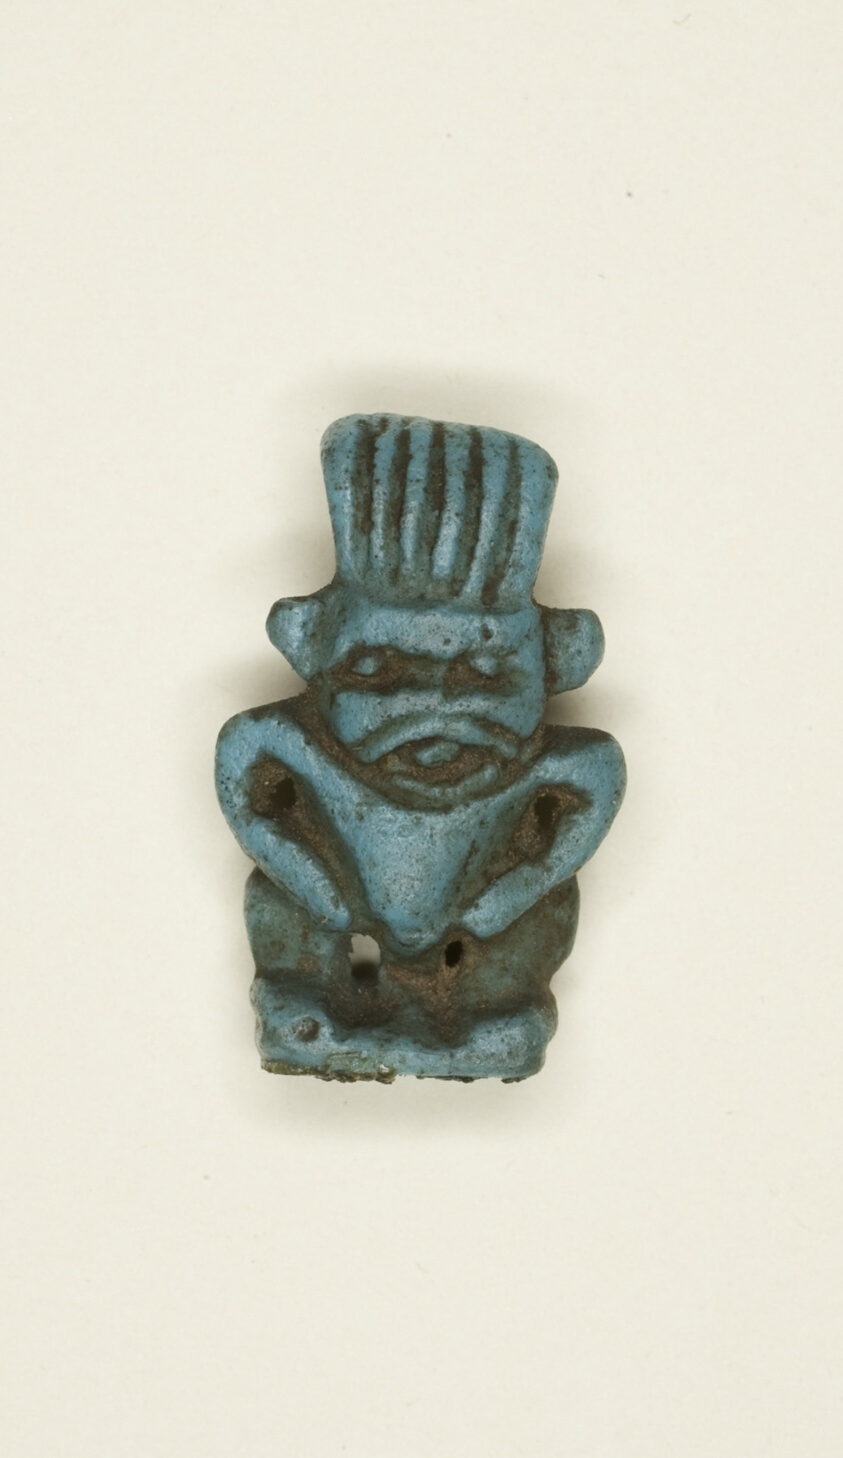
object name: Costume and Accessories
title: Amulet of the God Bes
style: third intermediate period, egyptian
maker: Egyptian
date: Third Intermediate Period, Dynasty 21–25 (1070–656 BCE)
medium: Faience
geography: Egypt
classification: amulet; jewelry; ceramics; ancient art; costume; faïence (composite material)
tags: gods (deities)